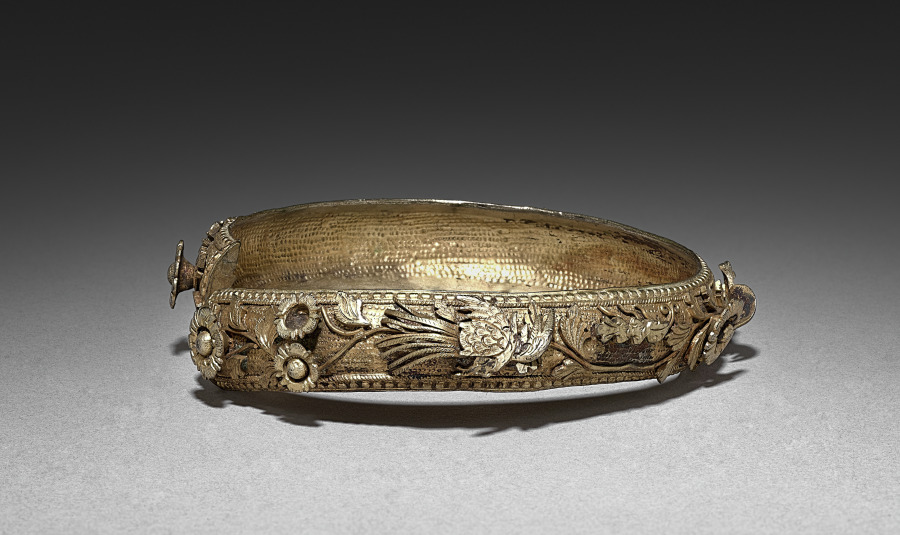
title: Armlet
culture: Burma (?)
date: 1800s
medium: silver gilt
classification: Jewelry